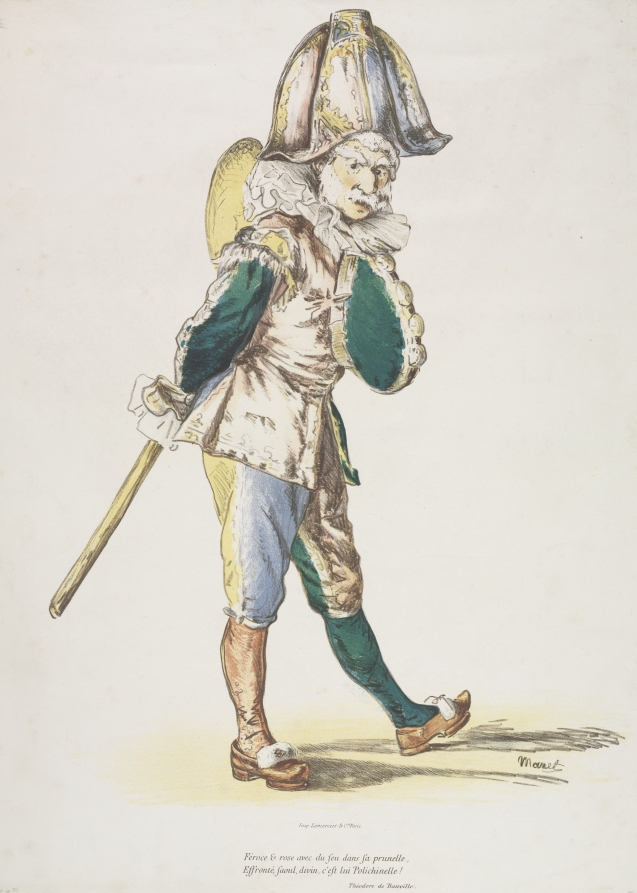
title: Polichinelle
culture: France, 19th century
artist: Édouard Manet (French, 1832–1883)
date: 1876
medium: lithograph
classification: Print